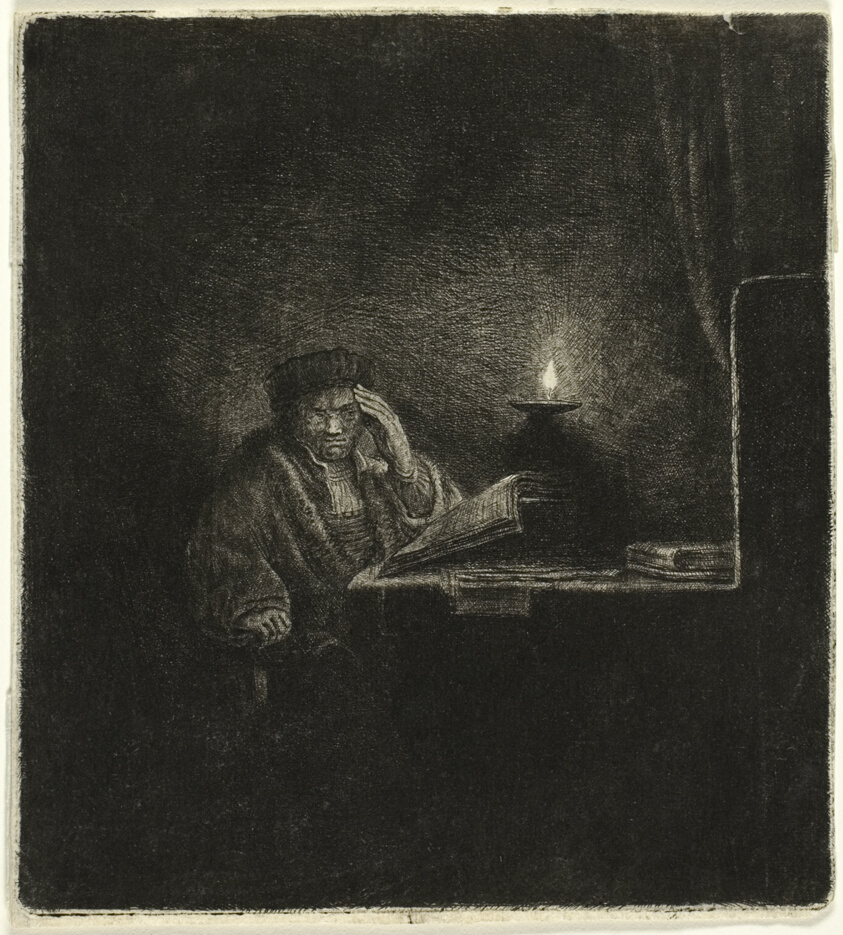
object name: Print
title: Student at a Table by Candlelight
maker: Salomon Savery (Dutch, 1594-1683); after Rembrandt van Rijn (Dutch, 1606-1669)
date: 1642/65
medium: Etching on paper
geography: Netherlands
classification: etching; print; prints and drawing